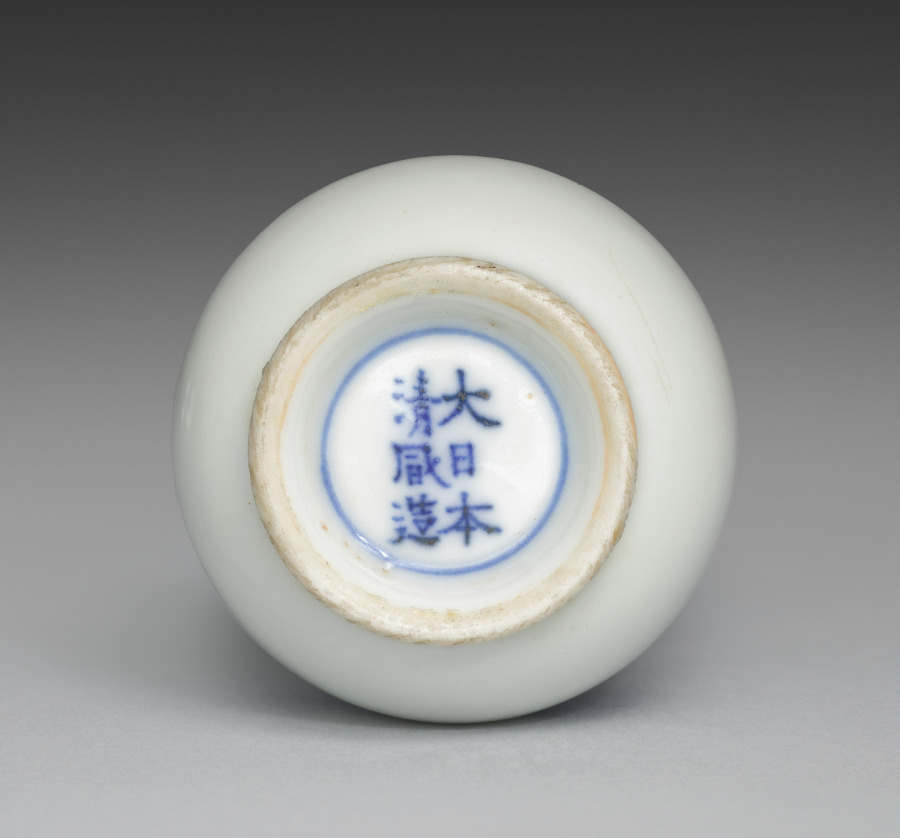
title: Cup from Sake Cups with Dragons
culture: Japan, Meiji period (1868–1912)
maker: Seifū Yohei III (Japanese, 1851–1914)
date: c. 1893–1914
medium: One from a set of six sake cups; porcelain with underglaze blue and iron oxide rims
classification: Ceramic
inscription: 大日本清風造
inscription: 清風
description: Each of these sake cups pictures two backward-looking dragons. The highly stylized creatures resemble jade carvings.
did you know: Seifū Yohei III was inspired by the Chinese mythical animals that were common on porcelain objects made at Jingdezhen in China during the Ming dynasty (1368–1644) and then exported around the world.